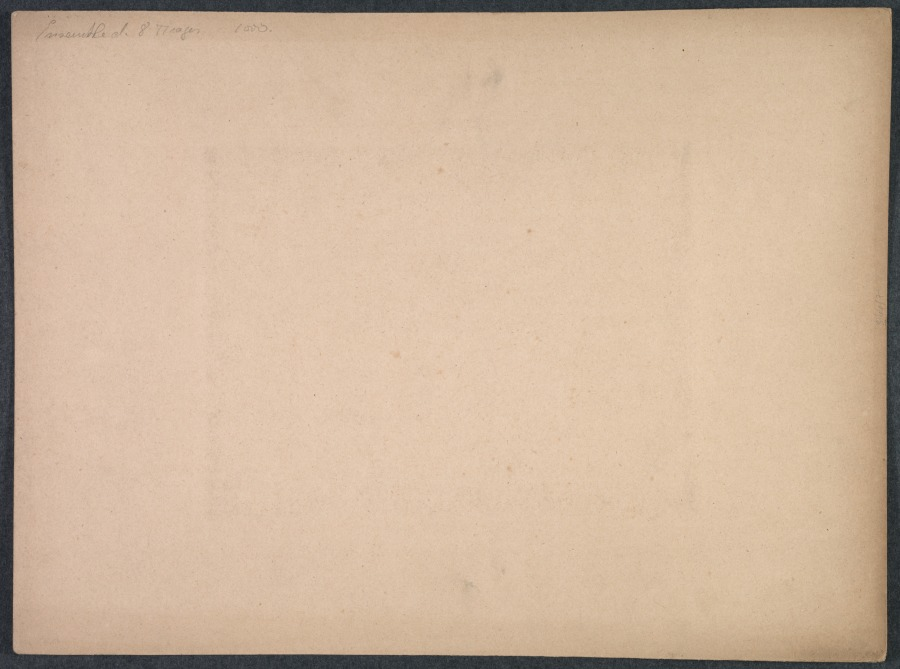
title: Trichinopoly Horse Court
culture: England, 19th century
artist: Francis Frith & Co. (British)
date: 1850s-1870s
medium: Albumen print from wet collodion negative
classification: Photograph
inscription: Albumen print from wet collodion negative Imprinted in bottom left corner of the image: "FRITH'S/SERIES" Written in red marker on recto of mount: "A.5" Written in brown ink on recto of mount: "Hoarse Court Seringham Pagodas" Written in pencil on recto of mount: "150" Written in pencil on verso of mount: "Ensembled 8 77 rajes 1000 (?)"